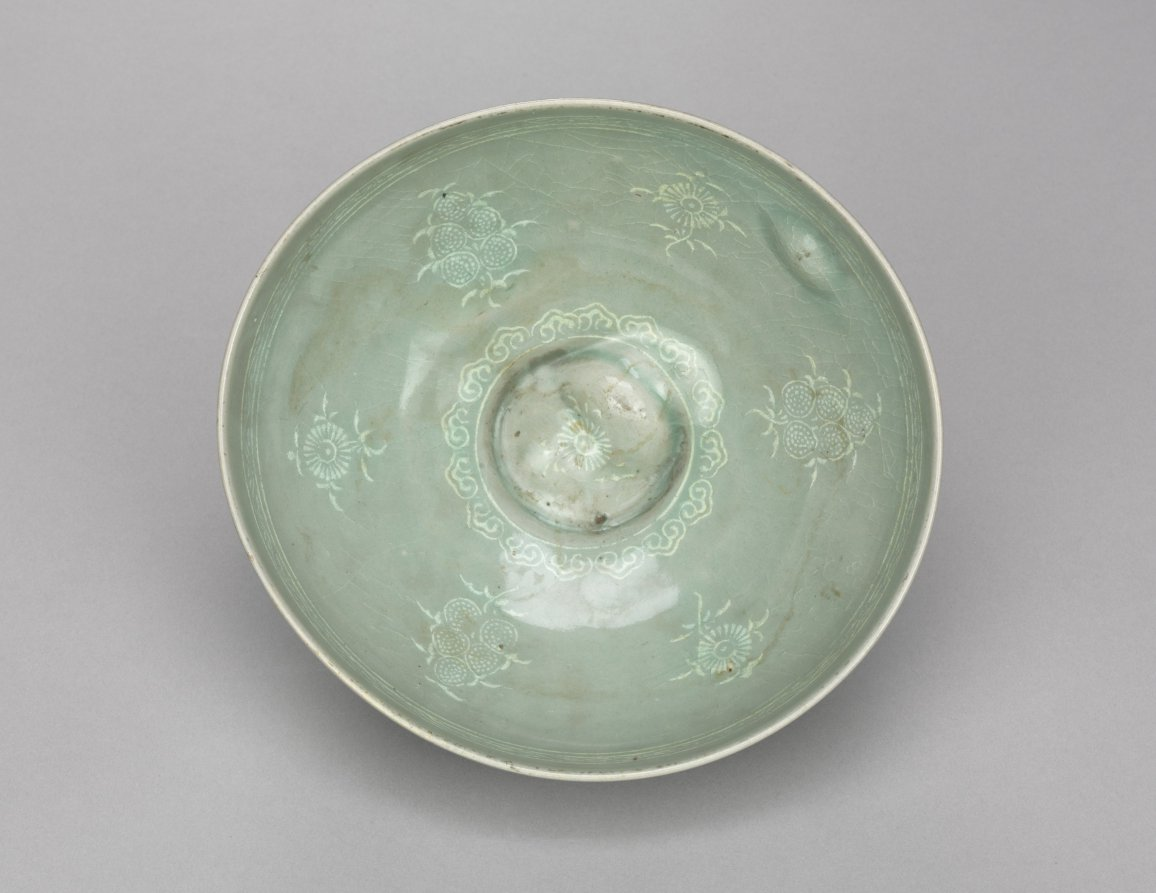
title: Bowl with Inlaid Chrysanthemum and Lychee Design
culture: Korea, Goryeo dynasty (918–1392)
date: 1300s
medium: pottery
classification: Ceramic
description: As early as the seventh century, the practice of drinking tea and wine became an important part of elite leisure culture in Korea. A wide bowl like this example was especially suitable for drinking powdered tea shaved from a compressed tea cake, the most commonly enjoyed type during the Goryeo period. The outer wall is lavishly decorated with the inlaid image of flowering vines, the inner wall with the inlaid image of chrysanthemum and lychee. Such elaborate design tells us that tea wares then were aesthetically invested objects of luxury.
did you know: Kangjin and Buan kilns in Jeolla province were the two major production centers for celadon wares during the Goryeo period (918-1392).